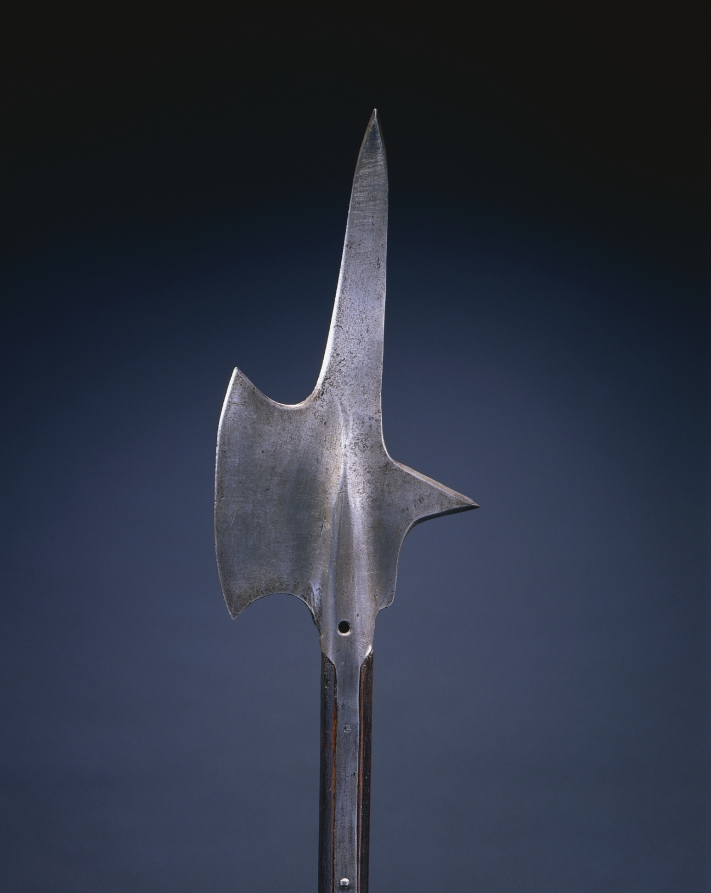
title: Halberd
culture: Switzerland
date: 1600s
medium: steel; rectangular wood haft with planed corners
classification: Arms and Armor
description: The halberd was a staff weapon favored by European infantries (foot soldiers) of the 1400s and 1500s for its versatility and deadly effect. The word halberd comes from the German words Halm (staff) and Barte (axe). The halberd is, in fact, an axe that served multiple functions: the axe blade was used for hacking, the spike for thrusting, and the beak for piercing plate armor or for pulling a knight from his saddle. The halberd was used by shock troops (those who lead an attack) and by Swiss and German mercenaries. After about 1550, the halberd gradually became less functional. Its large blade provided space for coats of arms and insignia. By the late 1500s, the parade halberd had become a ceremonial weapon for palace guards.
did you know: By the mid-1500s halberds started to change in appearance; elements were exaggerated to become more ornamental.